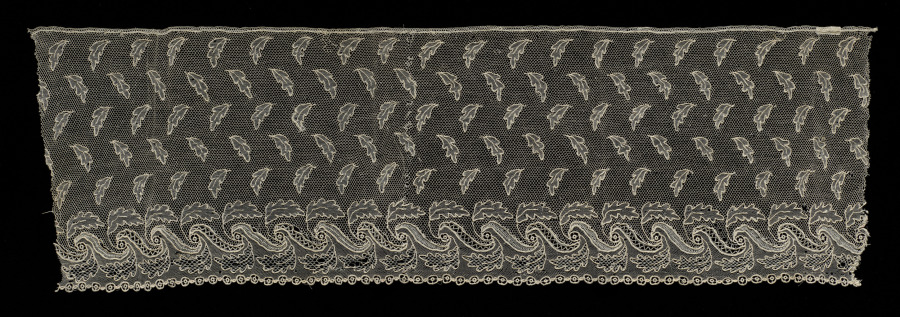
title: Needlepoint Lace Edging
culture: France, Alençon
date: 19th century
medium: lace, needlepoint: linen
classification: Lace